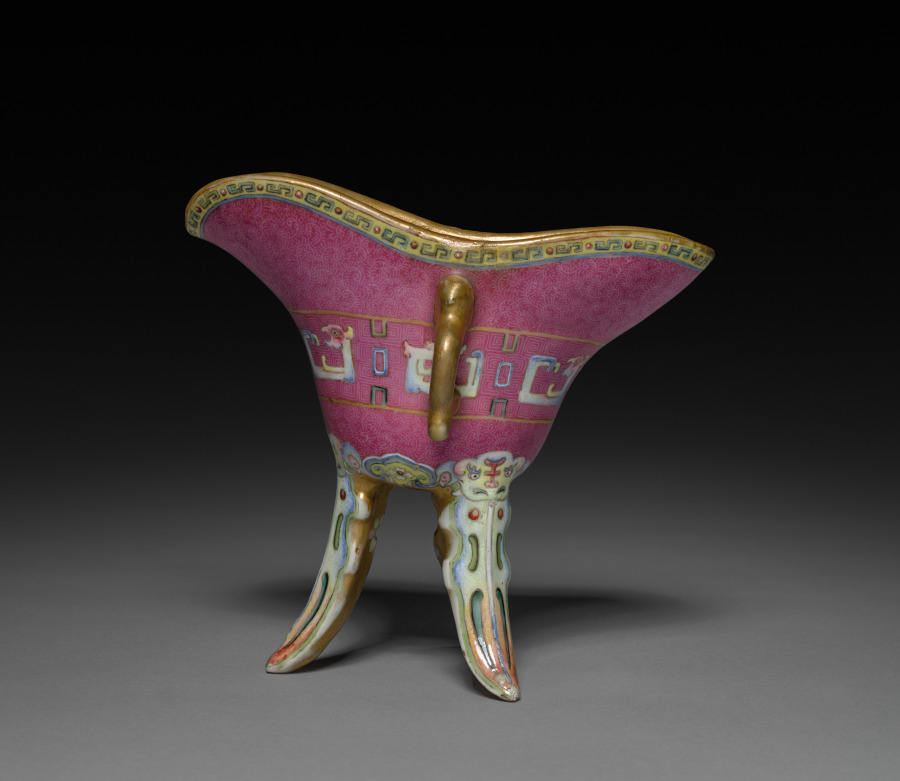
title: Libation Cup of Bronze Format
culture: China, Qing dynasty (1644-1911)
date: 1800s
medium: porcelain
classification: Ceramic